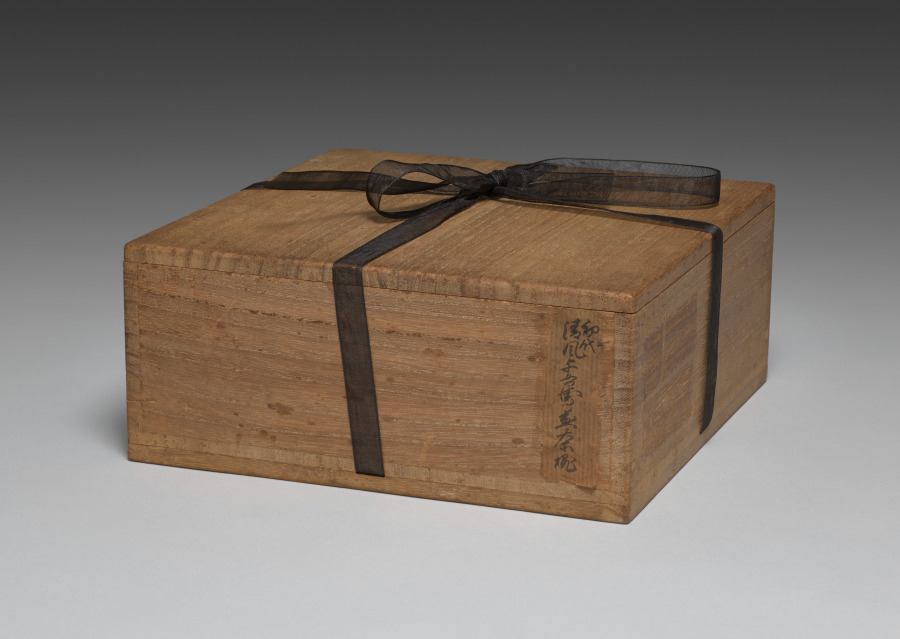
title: Teacups with Dragons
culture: Japan, Edo period (1615–1868)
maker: Seifū Yohei I (Japanese, 1801–1861)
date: 1840s–57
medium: Set of five tea cups; porcelain with underglaze blue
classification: Ceramic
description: Seifū Yohei I made both blue and white porcelains after Ming dynasty (1368–1644) Chinese wares fired in the kilns at Jingdezhen for export. He also made colorful stoneware in the style of his teacher, Nin’ami Dōhachi (Takahashi Dōhachi II) (1783–1855).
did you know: A small figure of an elephant serves as the handle for the lid.